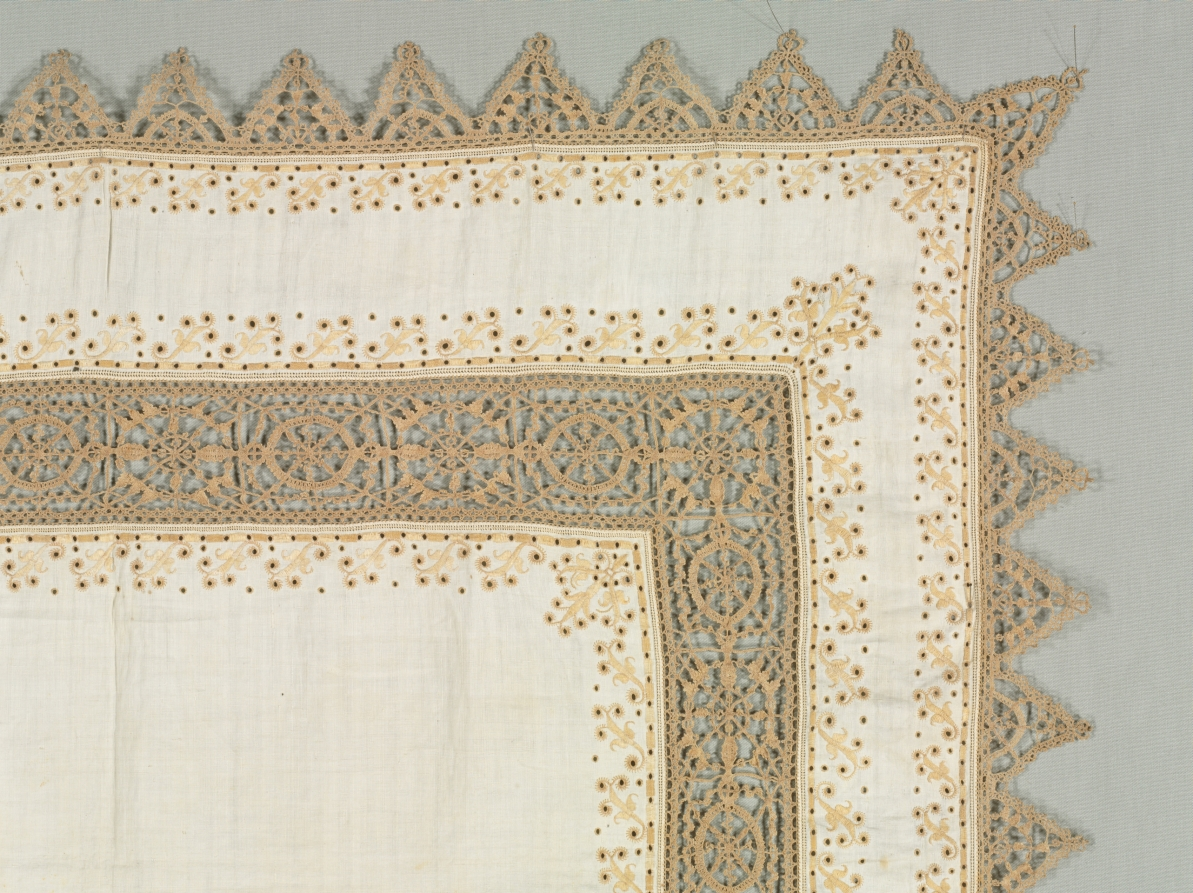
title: Cloth for a table ?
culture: Italy, Sicily, 1550-1599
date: 1550–1599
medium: Linen: bobbin lace (needle lace design)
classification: Lace